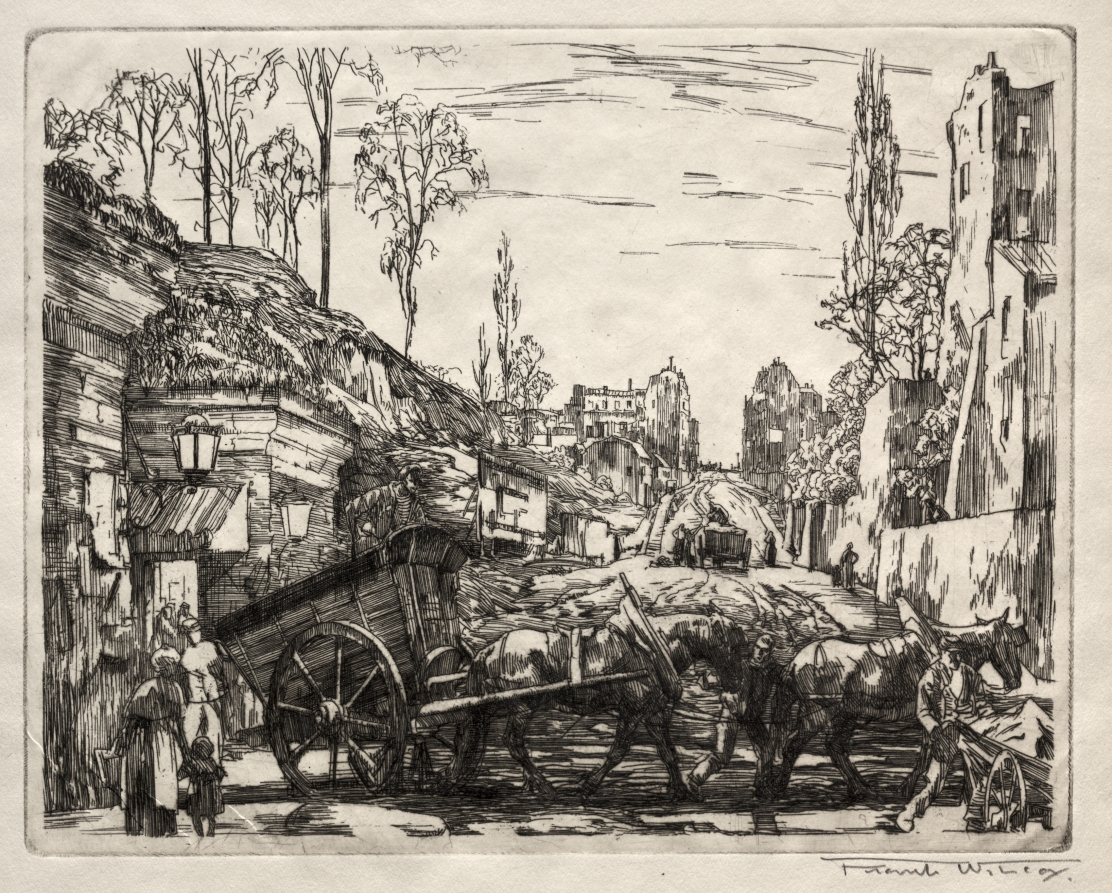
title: Paris Gate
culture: America, Ohio, Cleveland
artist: Frank Wilcox (American, 1887–1964)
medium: etching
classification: Print